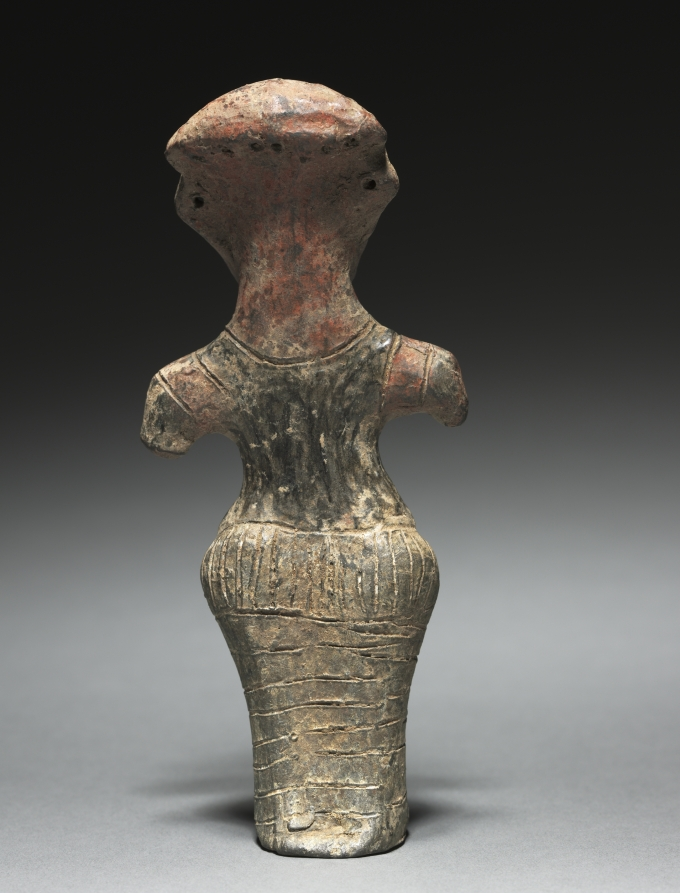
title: Vinca Idol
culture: Serbia, Vinça culture, Neolithic Era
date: 4500–3500 BCE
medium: fired clay with paint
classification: Ceramic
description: This statuette, probably a cult idol, dates to the Neolithic Era which saw the development of farming and human technology. It is extraordinarily well preserved and derives from the settlement at Vinca in modern Serbia. This flourishing culture was the largest known in Europe at that time, extending along the Danube into the Balkans and Central Europe. Thousands of clay statuettes have been discovered in the region's Vinca settlements suggestive of the intense magic-religious practices within the Vinca culture. This statuette is anthropomorphic, or human-shaped, and is presumed to have been used for ritual purposes. The use of red paint is typical of Vinca Neolithic figurines, and few have survived in such excellent condition.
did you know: If you look closely, you can see remnants of red pigment on this diminutive figure.